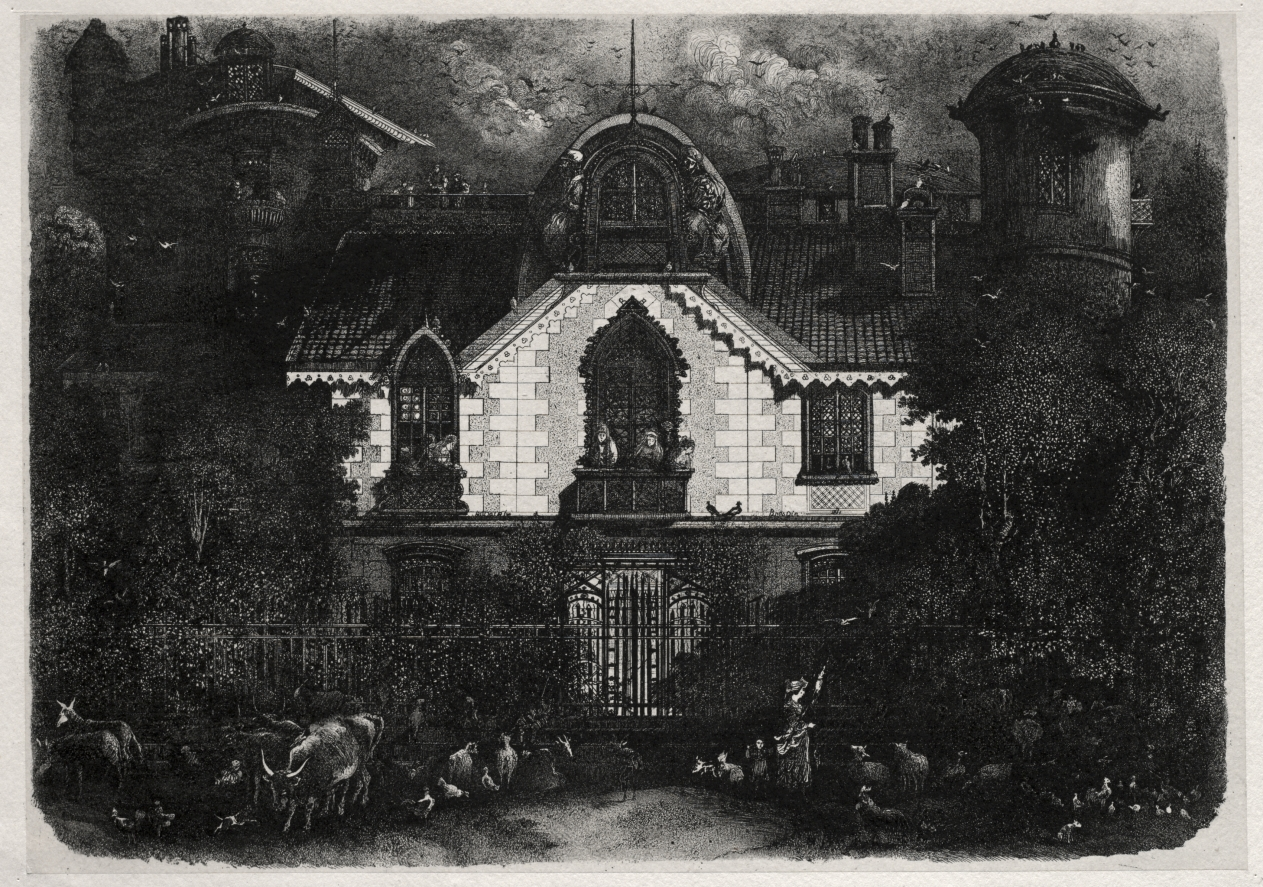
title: The Enchanted House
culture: France, 19th century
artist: Rodolphe Bresdin (French, 1822–1885)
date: 1871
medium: lithograph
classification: Print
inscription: center, in stone: Rodolphe Bresdin 1871